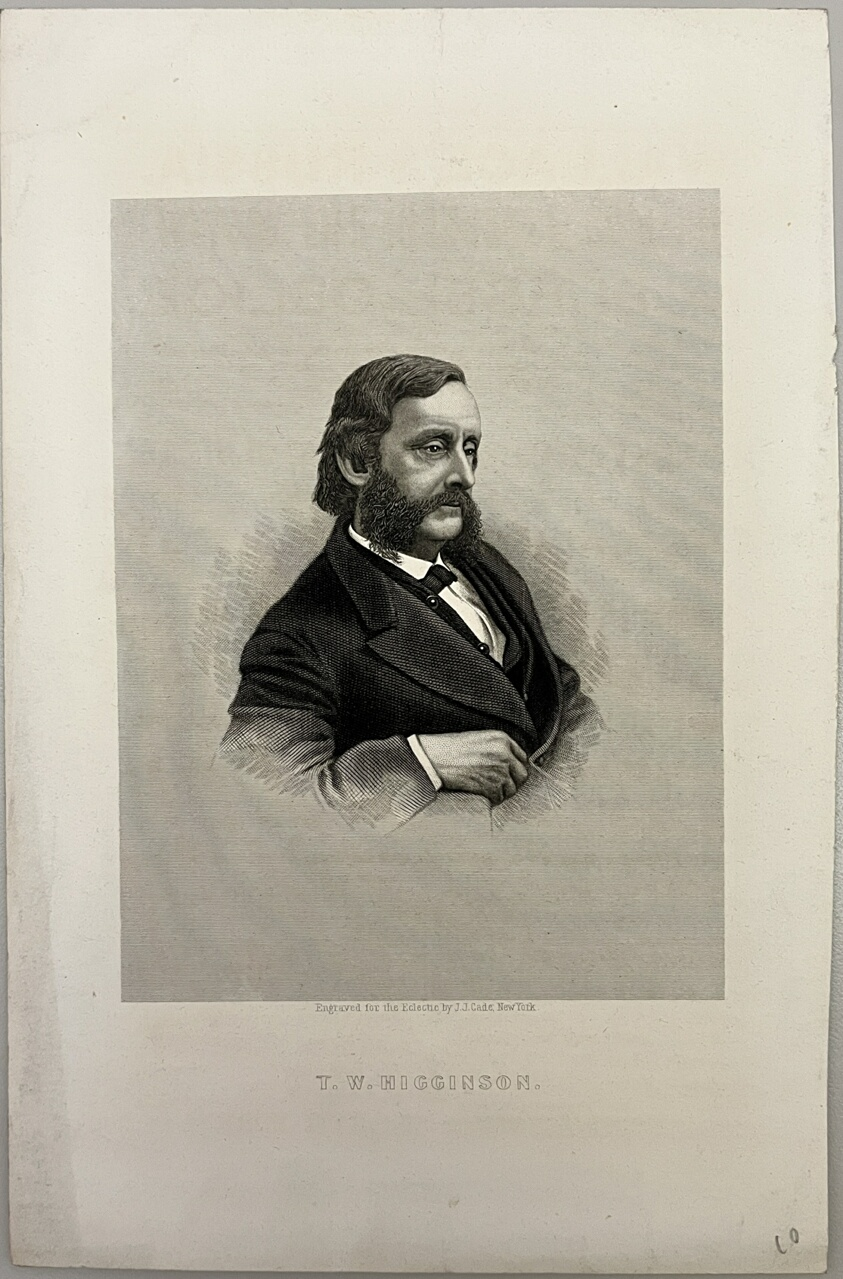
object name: Print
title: Thomas Wentworth Higginson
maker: J.J. Cade (American, 19th century)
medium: Stipple and line engraving on paper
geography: United States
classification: reproduction; print; prints and drawing